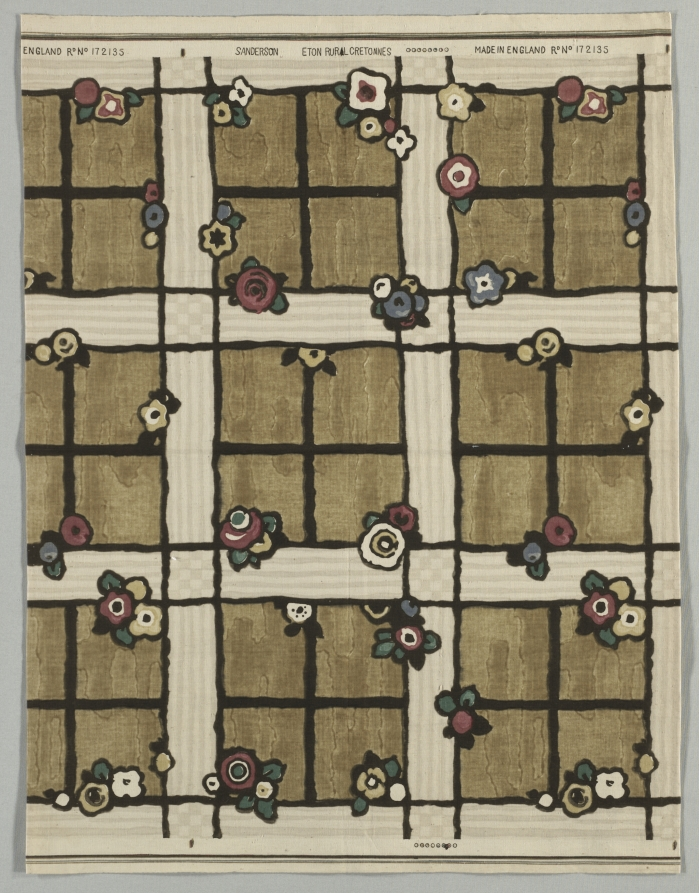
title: Eton Rural Cretonne (No. 172135)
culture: England, late 19th century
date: late 19th century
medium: plain weave cotton, printed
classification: Textile